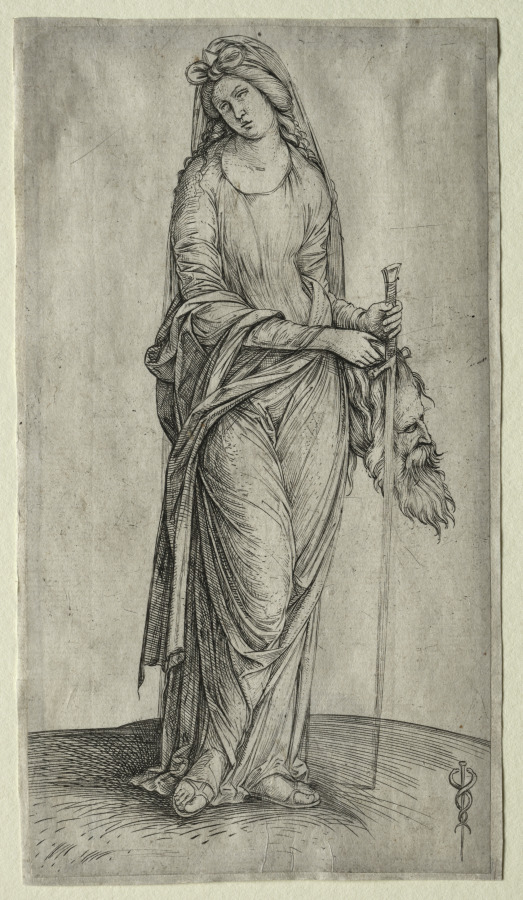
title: Judith Holding the Head of Holofernes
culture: Italy, 15th-16th century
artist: Jacopo de' Barbari (Italian, c. 1460/70–c. 1516)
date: c. 1501–1503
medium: engraving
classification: Print